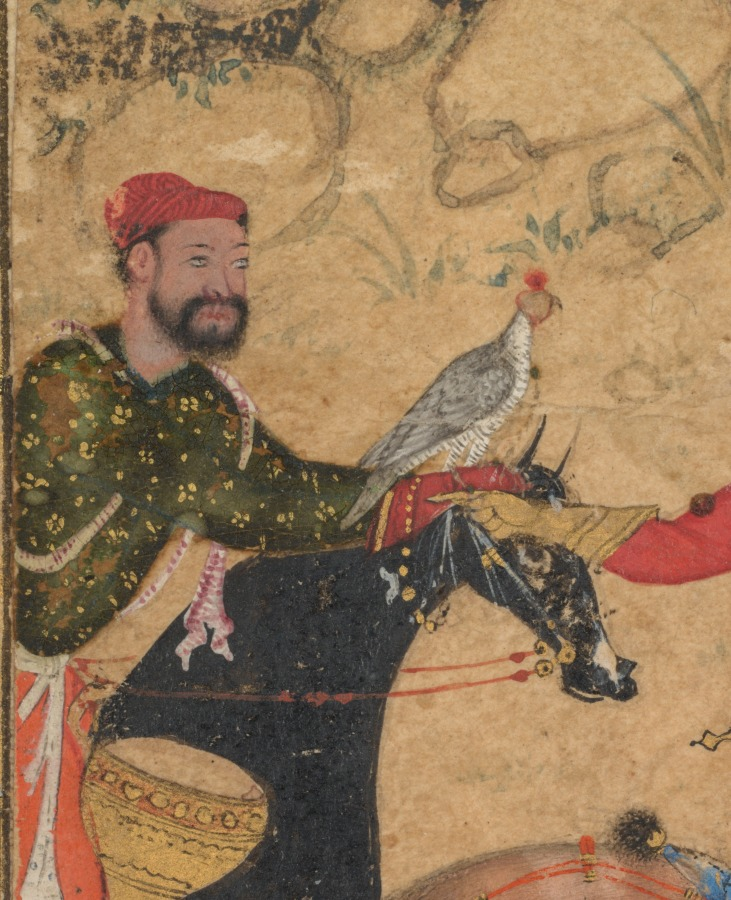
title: Hunting with falcons in a landscape (recto)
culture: Mughal India, court of Akbar (reigned 1556–1605)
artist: attributed to Abd al-Samad (Persian, c. 1510–1600)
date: c. 1558–60; borders added probably 1700s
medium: Gum tempera, ink, and gold on paper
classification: Painting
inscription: Inscription in upper right in nasta‘liq script, probably during the 1700s: the work of Mir Sayyid Ali, the illustrator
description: Mughal princes hunted on horseback with falcons. The hunting party would ride out into the wild and flush the prey from the brush. Then, its hood removed, the falcon would chase the prey and bring it down. This important work is thought to have been painted by one of the Persian artists Akbar’s father brought to India from Iran shortly after his arrival in India. The delicacy of the diminutive figures and the gently modeled rocks of the arid landscape contrast to the boldly dynamic paintings made by Indian artists.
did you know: The hunter’s glove is on the ground, as he pulls his falcon off the duck.